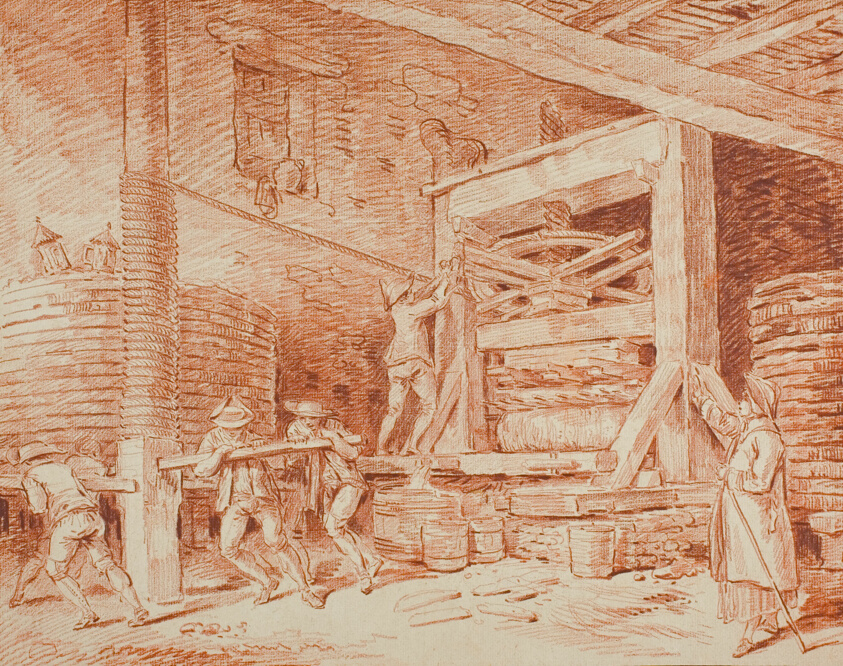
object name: Drawing and Watercolor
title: An Olive Oil Press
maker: Hubert Robert (French, 1733-1808)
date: c. 1759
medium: Red chalk on buff laid paper, laid down on cream laid card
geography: France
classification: chalk; drawings (visual works); prints and drawing